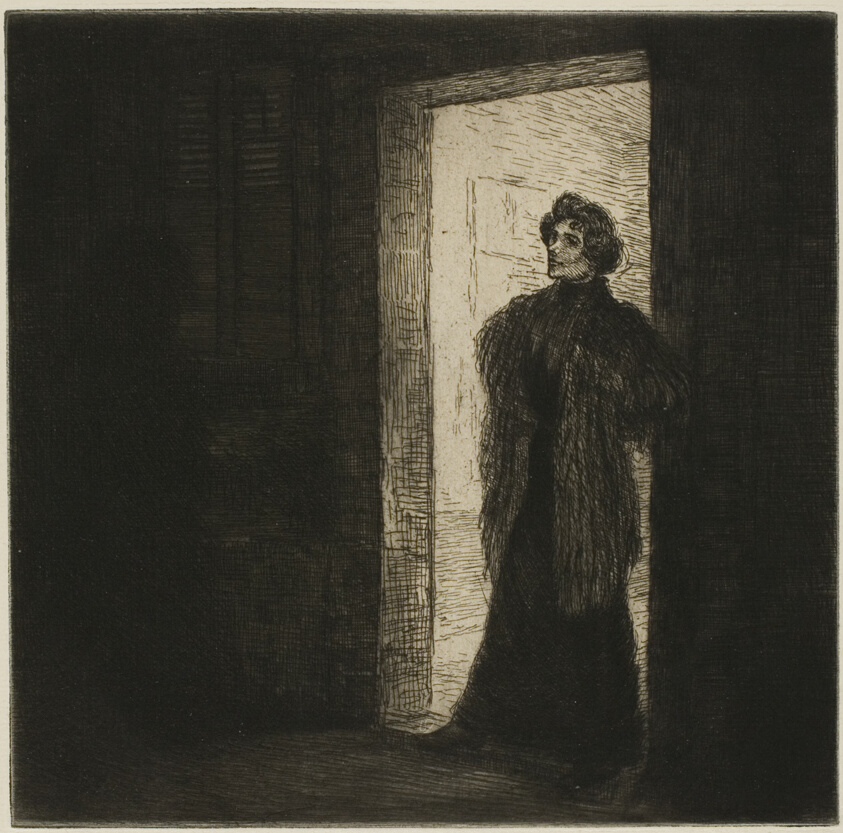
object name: Print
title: On the Threshold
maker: Théophile-Alexandre Steinlen; French, born Switzerland, 1859-1923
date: 1902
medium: Etching and drypoint from a zinc plate on ivory laid paper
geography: France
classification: etching; print; prints and drawing